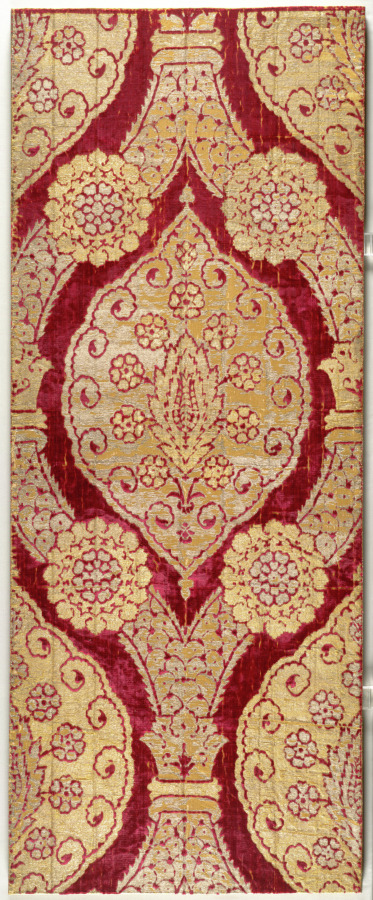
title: Brocaded velvet with medallions in ogival lattice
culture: Turkey, Istanbul or Bursa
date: late 1500s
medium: Silk: velvet, brocaded; gilt- and silver-metal thread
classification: Velvet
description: This luxurious velvet is similar to fabrics worn by Turkish sultans on elaborate ceremonial occasions at the imperial Topkapi Palace in Istanbul during the 1500s. Such bold patterns and high quality served to symbolize the immense power and unfathomable wealth of the Ottoman Empire. The design in this velvet was adapted from Ottoman court art and assembled to create lively contrasts between large motifs seen from a distance—medallion and lattice—and small designs that can only be admired up close—flowers and crowns.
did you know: The velvet was probably used as an upholstery fabric, part of an opulent cover for a divan (sofa) at the palace.